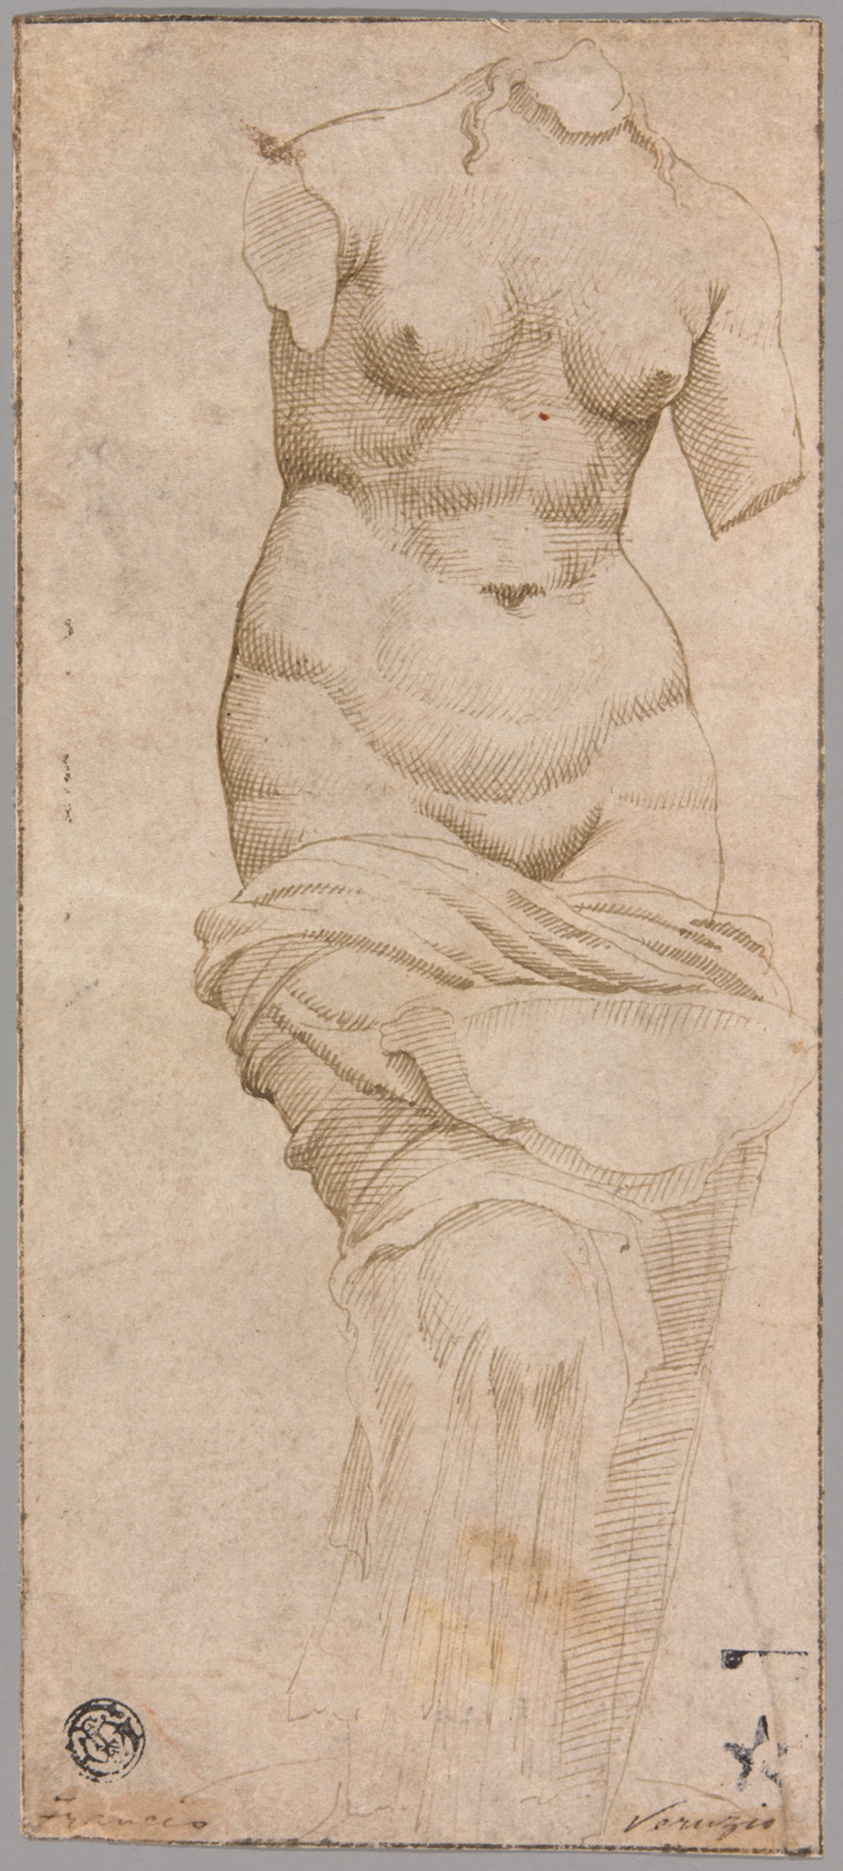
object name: Drawing and Watercolor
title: Celestial Venus (recto); Main Hall, Baths of Diocletian (verso)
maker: Circle of Maarten van Heemskerck; Netherlandish, 1498-1574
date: c. 1535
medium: Pen and brown ink (recto), and pen and brown ink, with brush and brown wash and black chalk (verso), on ivory laid paper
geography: Netherlands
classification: drawings (visual works); prints and drawing